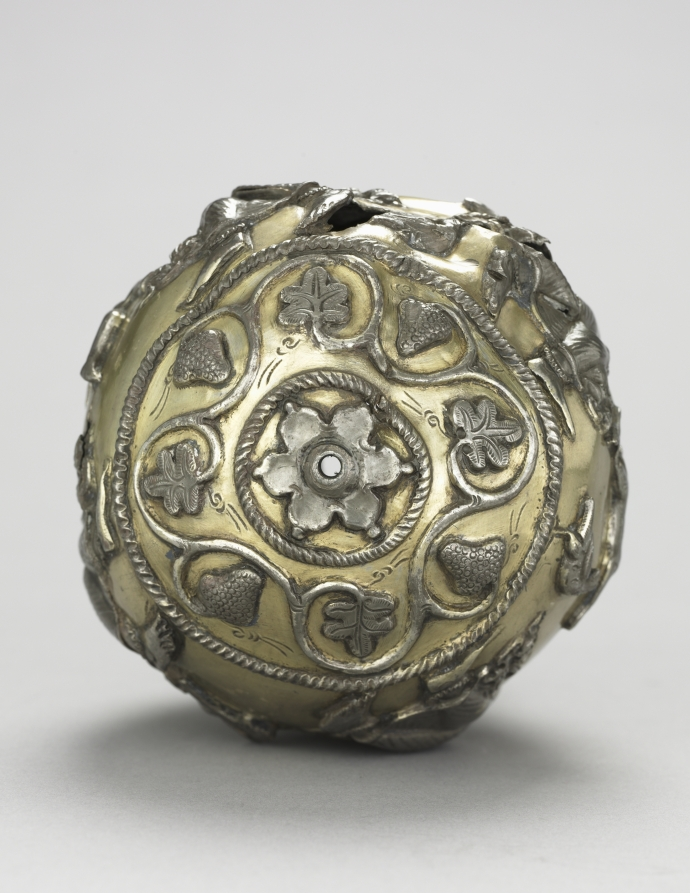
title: Anahita Vessel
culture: Iran, Sasanian Empire (224–651 CE)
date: 300–500 CE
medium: silver, cast, raised, repoussé, chased, and gilted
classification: Metalwork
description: These dancers may be sacred images of the Zoroastrian religion of the Sasanians or they may be bacchantes, followers of a cult of the Roman wine god, Bacchus, who was popular in the Near East.